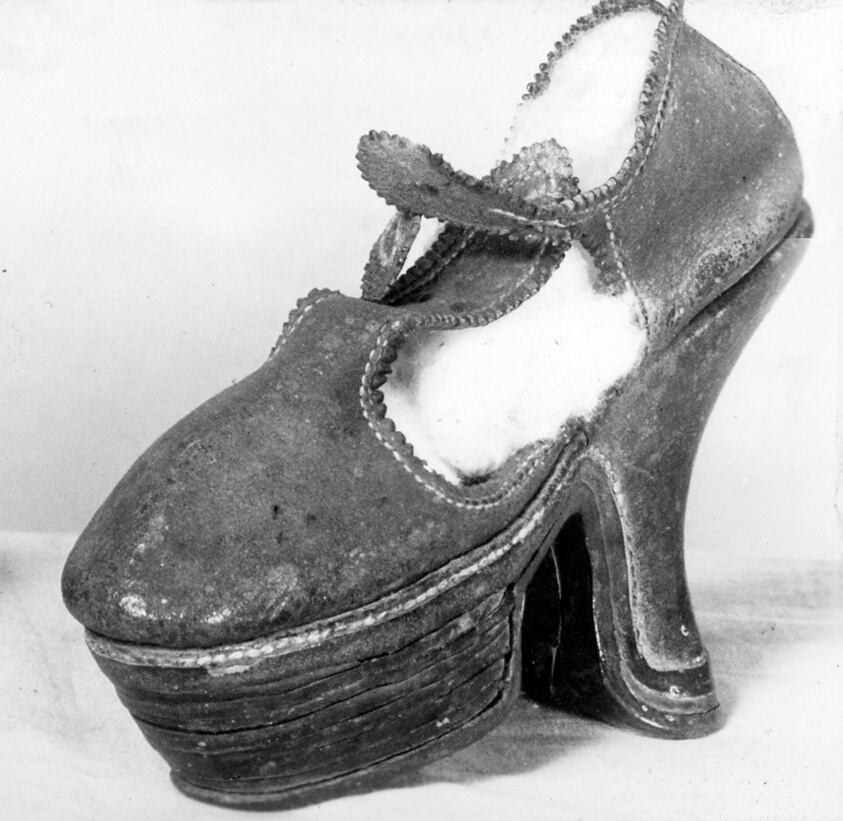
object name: Textile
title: Shoe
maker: France or Netherlands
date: 18th century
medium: Leather and wood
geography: France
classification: textile; shoes - misc; costume accessory - shoe; costume; dress (garment); clothing